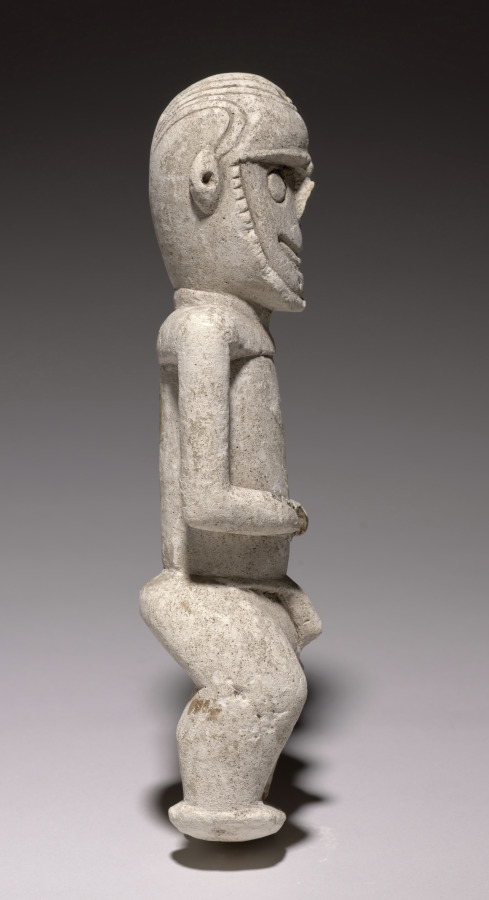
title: Male Ancestor Figure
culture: Melanesia, Central New Ireland, Namatani District, 20th century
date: before 1930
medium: limestone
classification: Sculpture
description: Carved and painted chalk figures from New Ireland served as repositories for the spirits of deceased men and women during funeral rituals. After the ceremony, the figures were destroyed or discarded, allowing the spirits to join their ancestors.